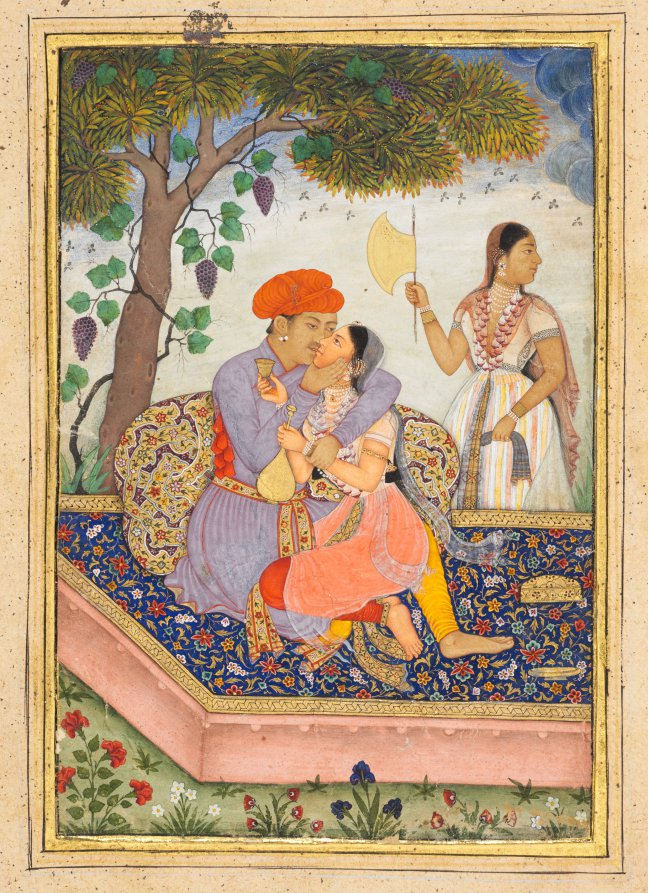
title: Lovers Embracing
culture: Mughal India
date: c. 1630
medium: Gum tempera and gold on paper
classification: Painting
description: The twining and coiling of the patterns on the carpet and large floor cushion mirror the interlaced bodies of the amorous couple. The clinging grapevine also references the wine they share from one cup. Such a carpet was not to be walked on, so the lovers do not wear shoes. It provides a luxurious furnishing to the intimate outdoor space. Here, the floral patterns evoke the pleasures of paradise. The textile patterns have been rendered with such precision that they appear like colorful enamel work or inlaid jewels. A covered golden box at right contains aromatic betel nut treats (paan) that freshen the breath.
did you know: Erotic metaphors in visual poetry: bees fly to blossoms as rain clouds approach.